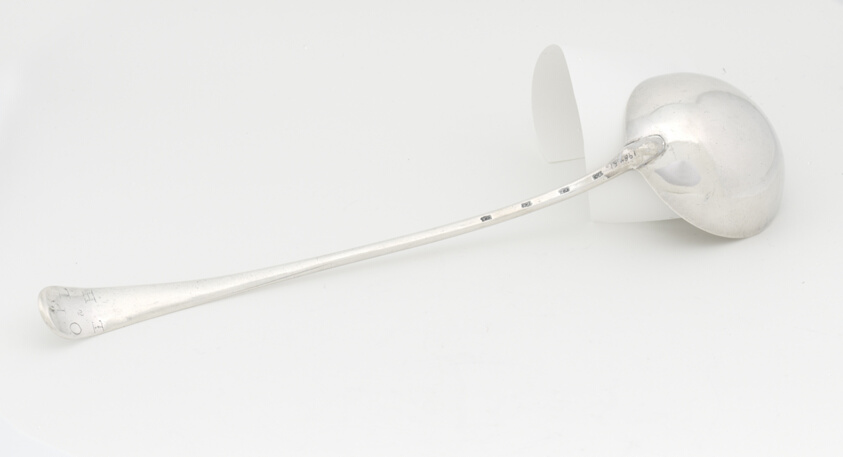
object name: Metalwork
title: Ladle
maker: William Hollingshead; American, active 1754–1785; Philadelphia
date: 1757–67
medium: Silver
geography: Philadelphia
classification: ladle; utensil for serving food; utensil; silver; american decorative arts; american arts; decorative arts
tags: dining, drinking